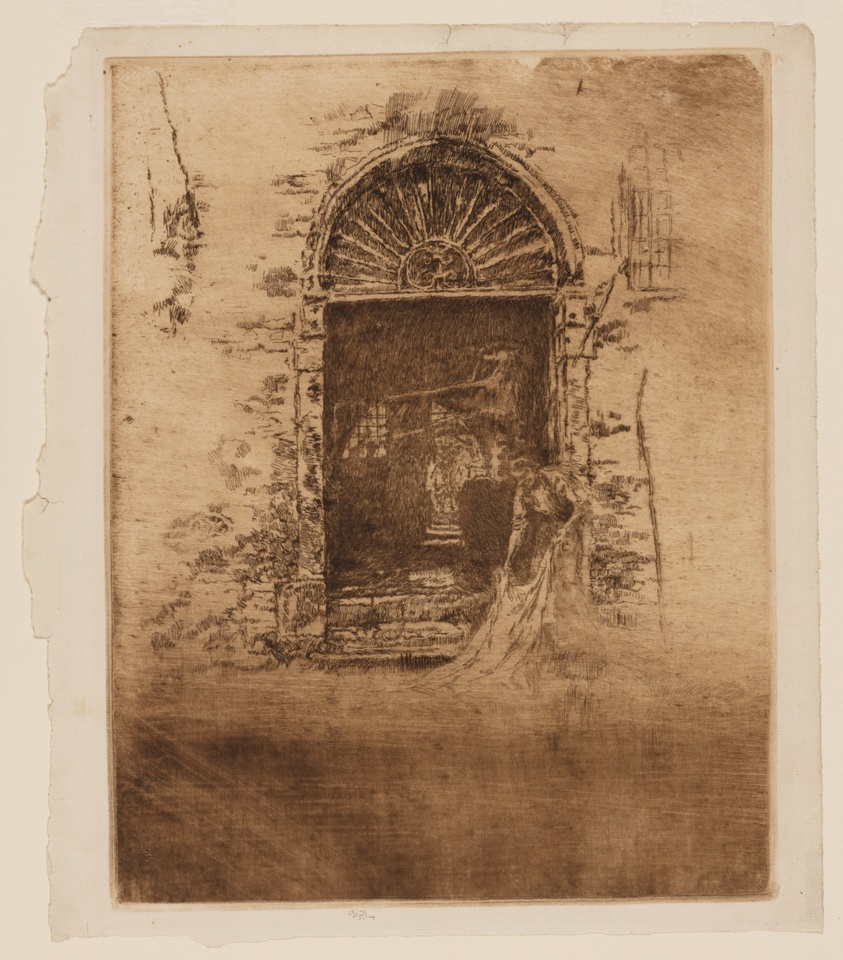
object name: Print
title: The Dyer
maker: James McNeill Whistler (American, 1834-1903)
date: 1879/80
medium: Etching and drypoint in brown ink on off-white laid paper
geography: United States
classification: etching; drypoint; print; prints and drawing; paper